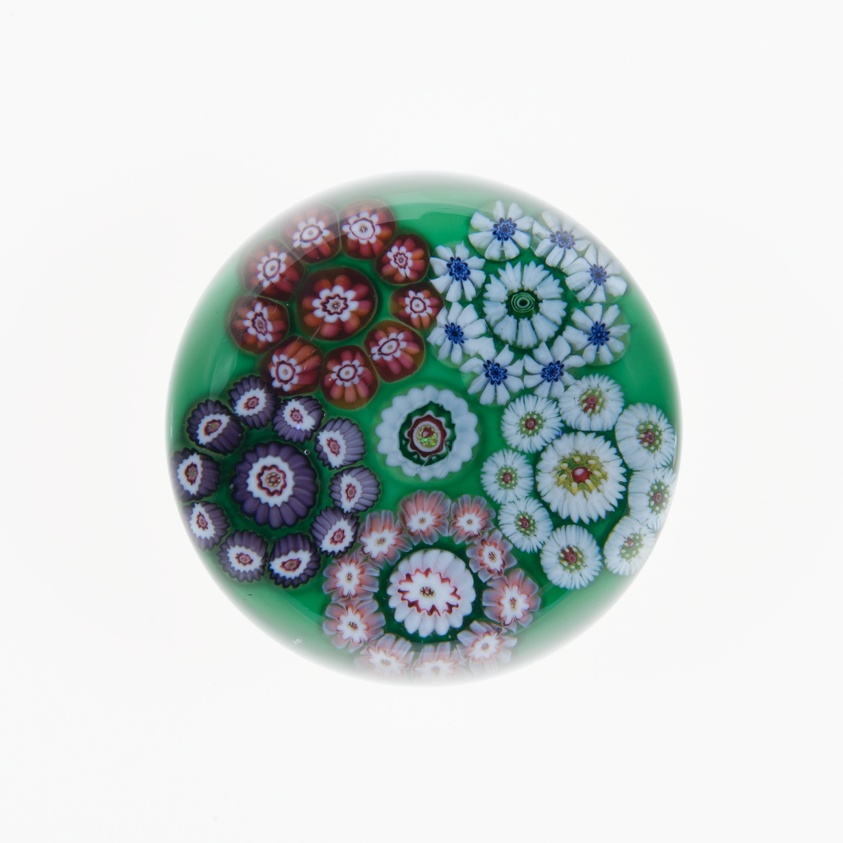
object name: Glass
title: Paperweight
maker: Clichy Glassworks (Cristalleries de Clichy); Clichy, France, 1837-1885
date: c. 1845/60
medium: Glass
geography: France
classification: paperweight; glass